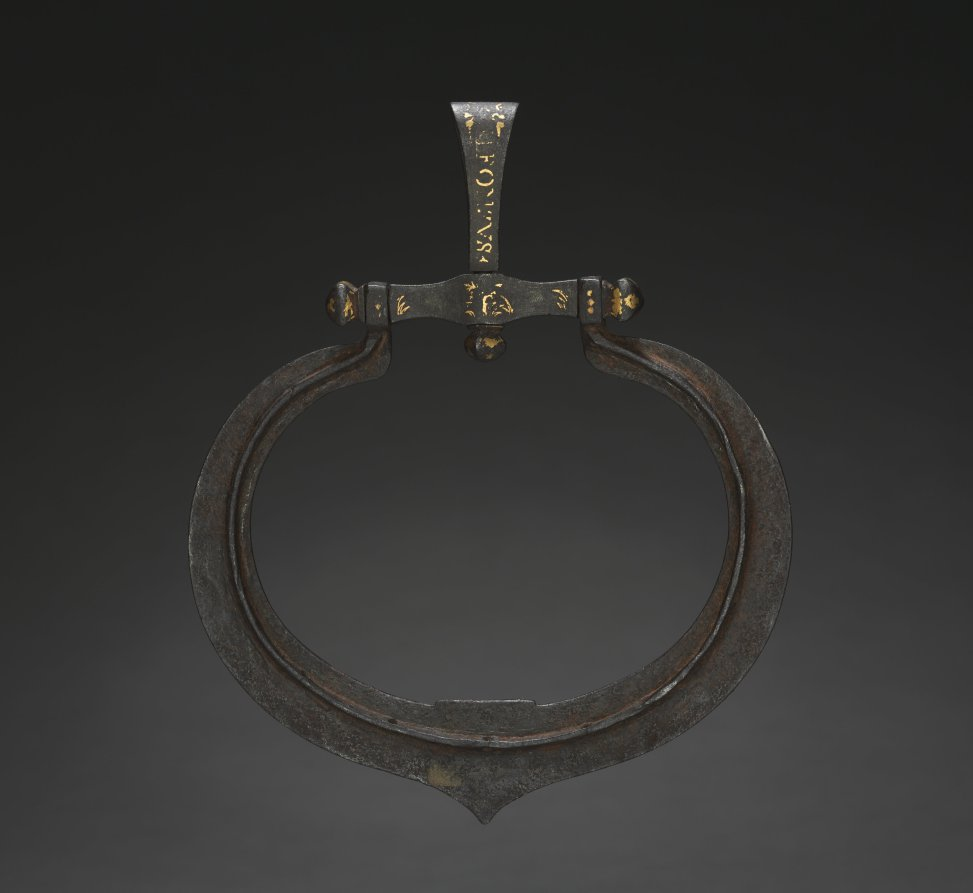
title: Mount for Purse or Escarcelle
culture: Spain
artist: workshop of Diego de Çaias (Spanish, 1535–1560)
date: c. 1559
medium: steel with gold inlay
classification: Metalwork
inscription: swivel suspension loop is inscribed: ALFONSUS ESTENSIS.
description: This object served as a frame for a mounted leather or cloth purse. Worn by men at the waist, such purses were attached by means of a suspension swivel. The handsome gold inlay depicting hunting and military scenes includes the inscription ALFONSVS ESTENSIS, as well as a coat-of-arms that identifies the owner as Alfonso II d'Este, created Duke of Ferrara in 1559.